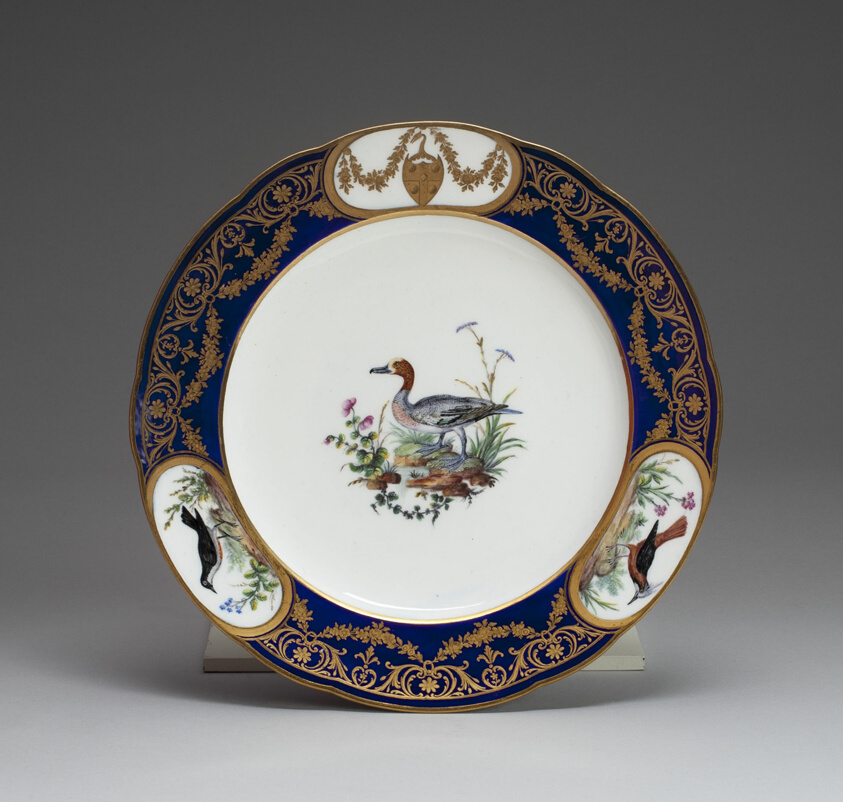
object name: Ceramics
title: Plate from the Sudell Service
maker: Sèvres Porcelain Manufactory; French, founded 1740; Painted by Etienne Evans (French, active 1752–86); Gilded by Henri-Martin Prévost (French, active 1757–97)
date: 1792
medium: Soft-paste porcelain, dark blue ground, polychrome enamels, and gilding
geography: Sèvres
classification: plate (general, dish); tableware; dish (vessel); ceramics; porcelain; european decorative arts